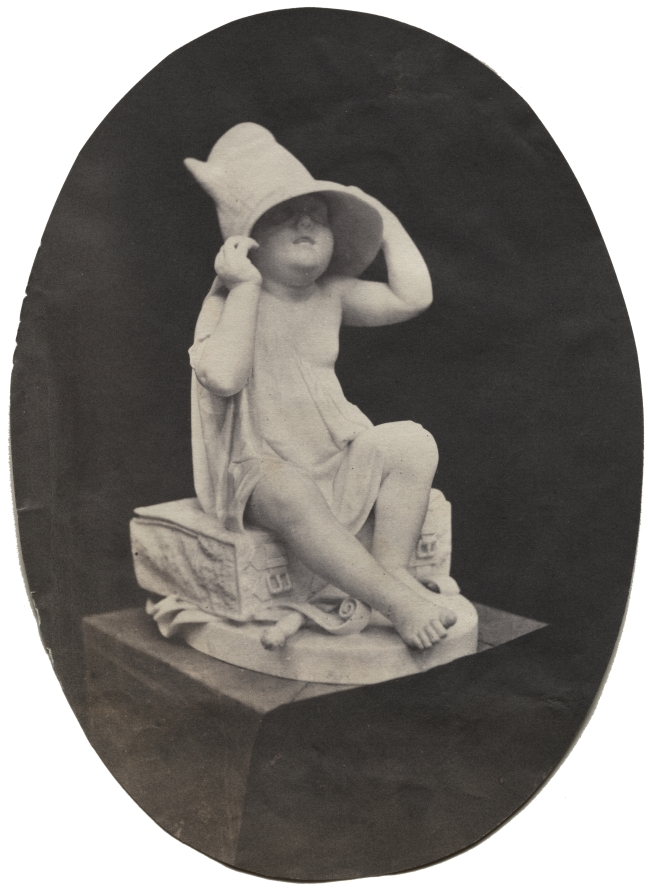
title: Statue of a Youth in Large Hat (from a John R. Johnston album)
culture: America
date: before 1857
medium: salted paper print from wet collodion negative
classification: Photograph